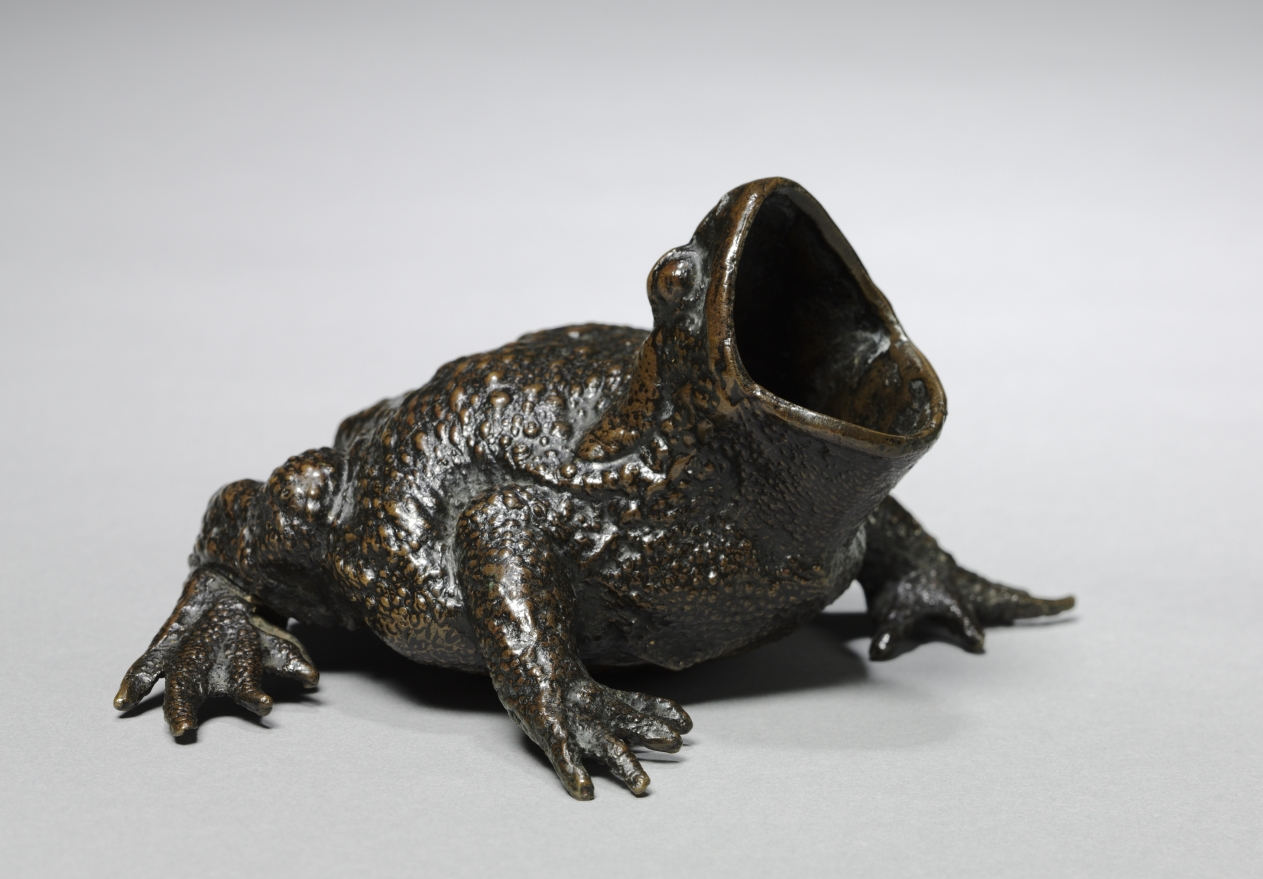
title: Toad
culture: Italy, possibly Padua, 16th century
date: c. 1500–1550 or later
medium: bronze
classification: Sculpture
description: Casting animals from life was a common Renaissance practice, connected to scholars’ interest in natural history and a taste for oddities. Drowning the toad in ammonia left the animal’s body intact. The workshop then manipulated the head, opened the mouth, and cast the creature as a functional object for the study.